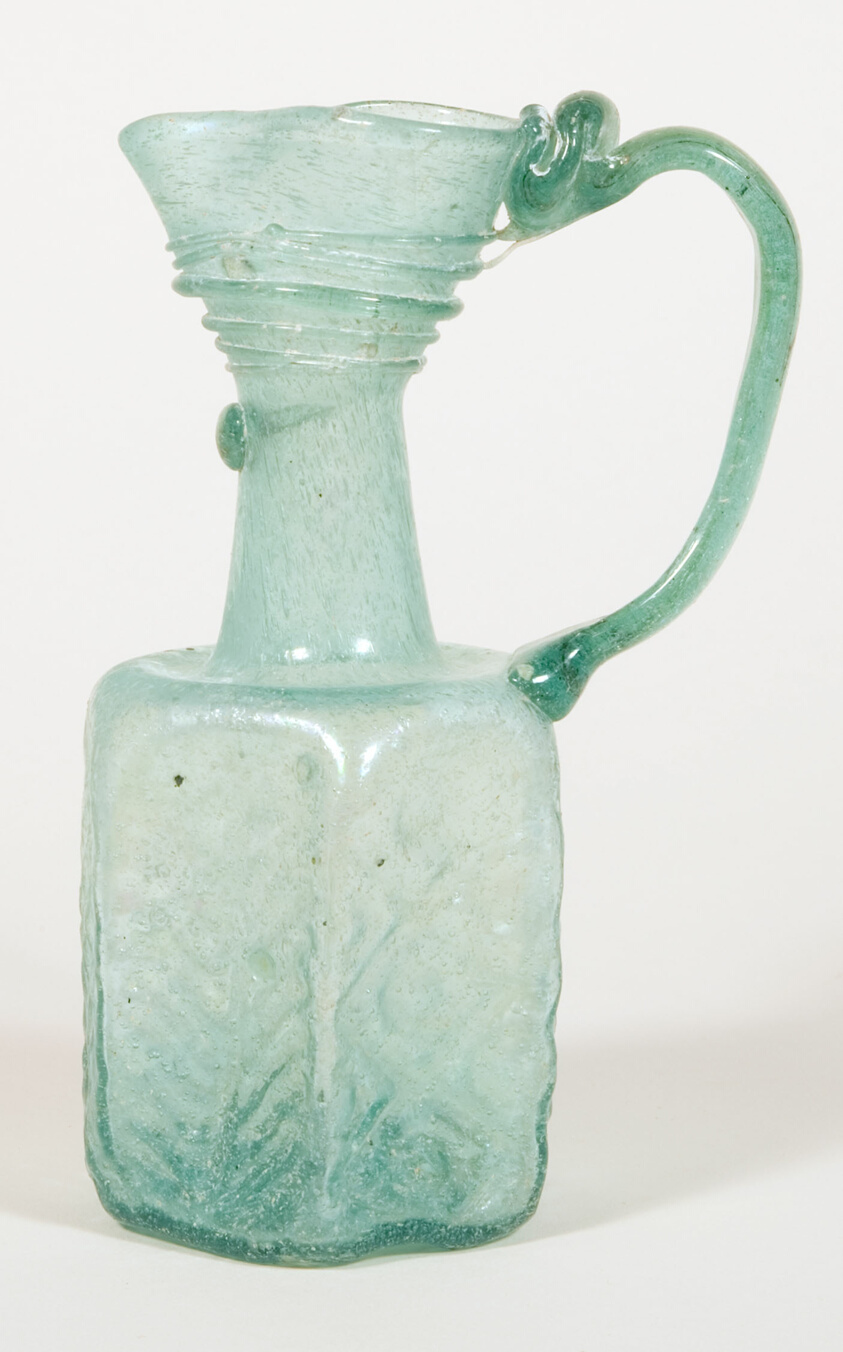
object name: Vessel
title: Jug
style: syrian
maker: Byzantine; Eastern Mediterranean, probably Syria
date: 6th century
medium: Glass, mold-blown technique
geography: Syria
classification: vessel; glass; ancient art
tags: vessels, religion